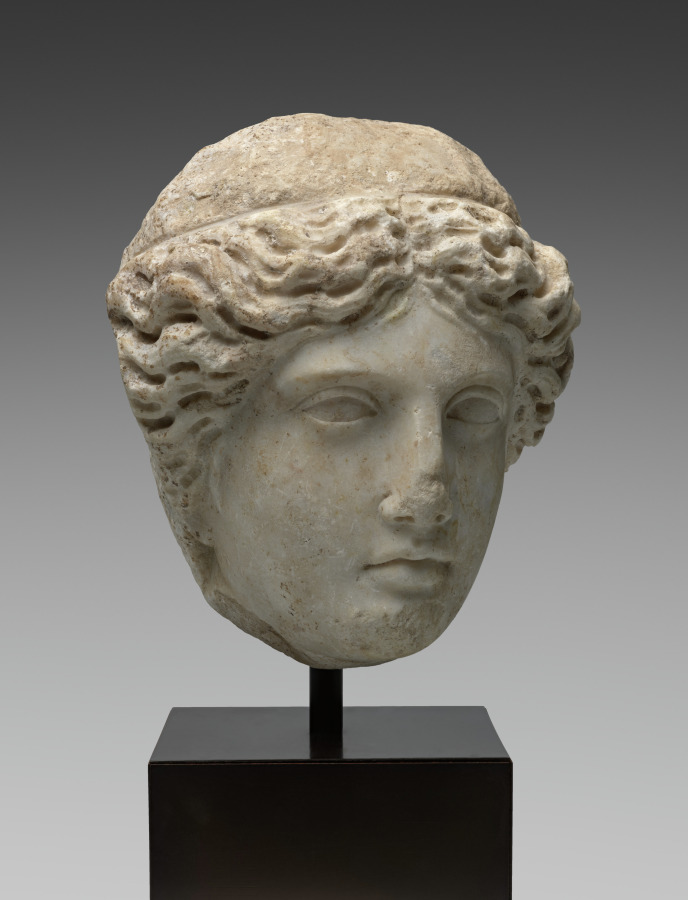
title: Head of Apollo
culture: Roman, Imperial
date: 1–200 CE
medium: marble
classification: Sculpture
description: This marble head, about three-quarter life-sized with idealized features, likely represents Apollo, the god most renowned for his youthful beauty. The hair spreads from a central part, flowing to either side in long and deeply drilled locks that cover the ears. An incised line separates these locks from a rougher area above, probably reserved for a separately made diadem or wreath, likely of metal.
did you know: This head of Apollo has also been identified as female, perhaps a Muse or other goddess.